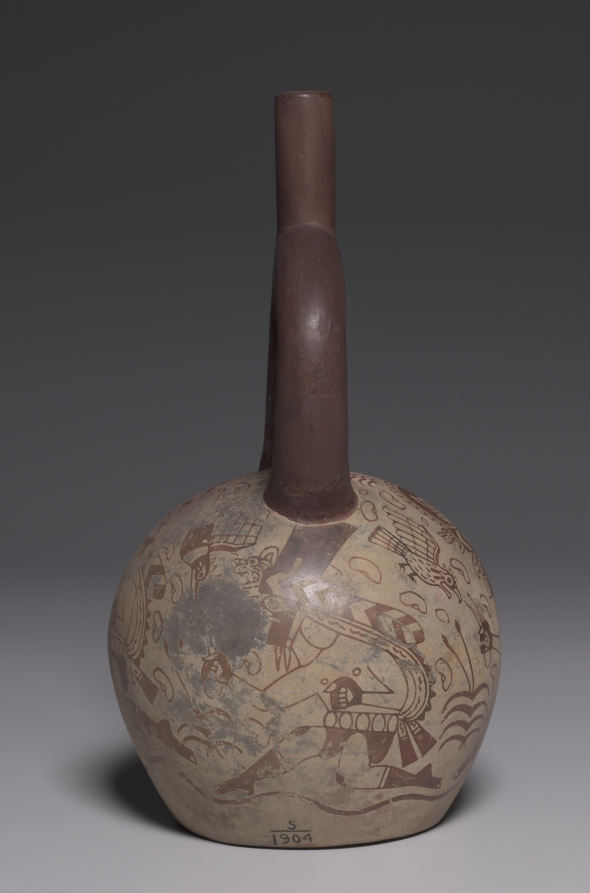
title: Vessel with Running Figures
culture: Peru, North Coast, Moche style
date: 450–550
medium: earthenware with colored slips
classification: Ceramic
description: Moche painters were masters at capturing the peak of physical activity. On this vessel are runners whose legs seem to churn so fast they ripple the desert groundline. Such runners, common in Moche art, always carry small bags, the contents open to question. But beans sometimes float around the runners, as here, suggesting they are involved in a ritual for planting. Beans also may have been used in rituals to divine the unknown.